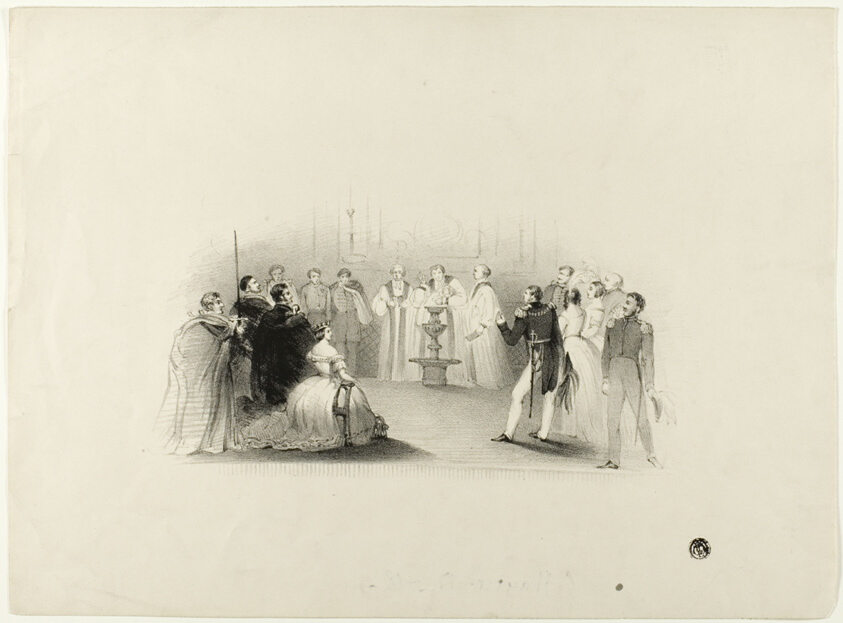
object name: Print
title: Christening of Edward VII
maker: John Hayter (English, 1800-c. 1891)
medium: Lithograph on paper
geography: England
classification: lithograph; print; prints and drawing